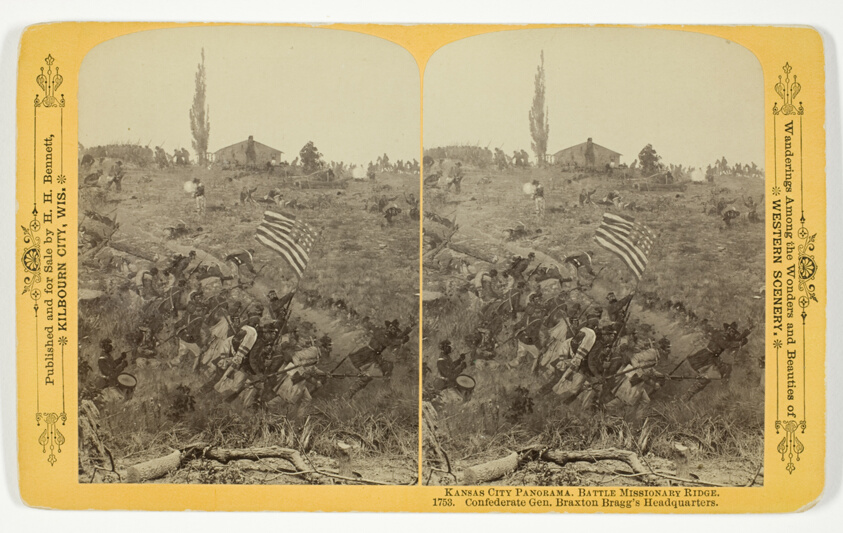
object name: Photograph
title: Confederate Gen. Braxton's Bragg's Headquarters, No. 1753 from the series "Kansas City Panorama. Battle Missionary Ridge"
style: 19th century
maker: Henry Hamilton Bennett (American, born Canada, 1843-1908)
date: 1889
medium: Albumen print, stereo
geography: Wisconsin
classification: photography; photograph; albumen silver print; stereograph (albumen)